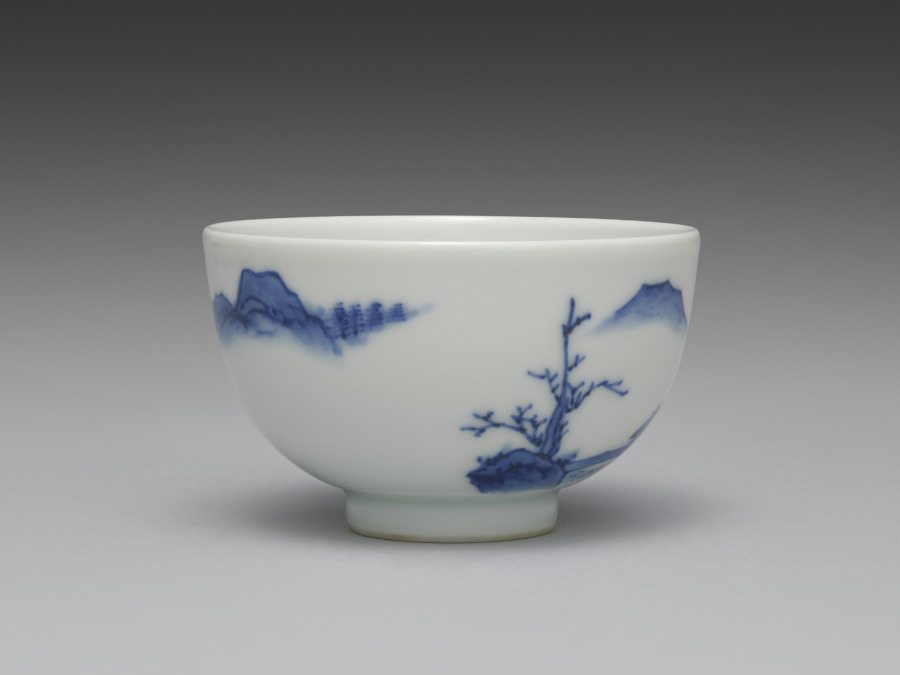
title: Teacup from Tea Set with Chinese Landscape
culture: Japan, Meiji period (1868–1912)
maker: Seifū Yohei III (Japanese, 1851–1914)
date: 1893–1914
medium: Porcelain with underglaze blue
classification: Ceramic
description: This tea set has a side-handled pot called a kyūsu, used for steeping, straining, and serving tea. Unlike some others, this set also has a yuzamashi, a container used to cool boiled water to just the right temperature for the best flavor when steeping. Seifū Yohei III’s painting teacher, Tanomura Chokunyū (1814–1907), made a visual record of famous sencha events that shows how these kinds of porcelains fit with objects such as a stove and kettle to form a complete set of utensils for tea preparation, and with ensembles of decorative objects meant to inspire creativity. The theme of this sencha tea set is the Chinese scholar-recluse in an idyllic landscape. Each of the five teacups has a landscape with an architectural structure and some human activity.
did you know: This cup shows a man in a traveling robe leaning upon his staff as he crosses a bridge to reach a two-story building with a pitched roof, possibly a temple, set between trees. Past this structure, another man sits fishing in a boat.